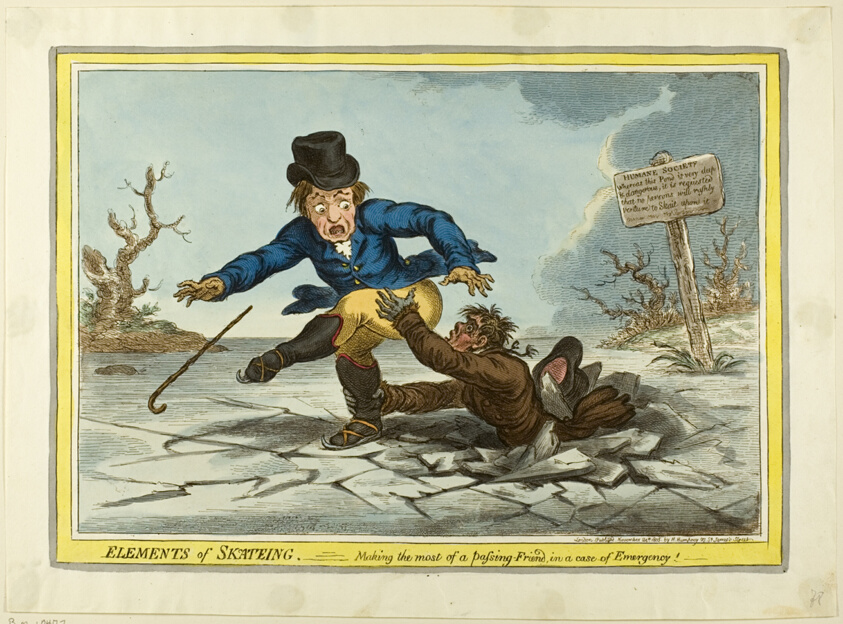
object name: Print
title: The Elements of Skating: Making the Most of a Passing Friend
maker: James Gillray (English, 1756-1815); published by Hannah Humphrey (English, c. 1745-1818)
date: published November 24, 1805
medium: Hand-colored etching, slightly aquatinted on paper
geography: England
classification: etching; print; prints and drawing